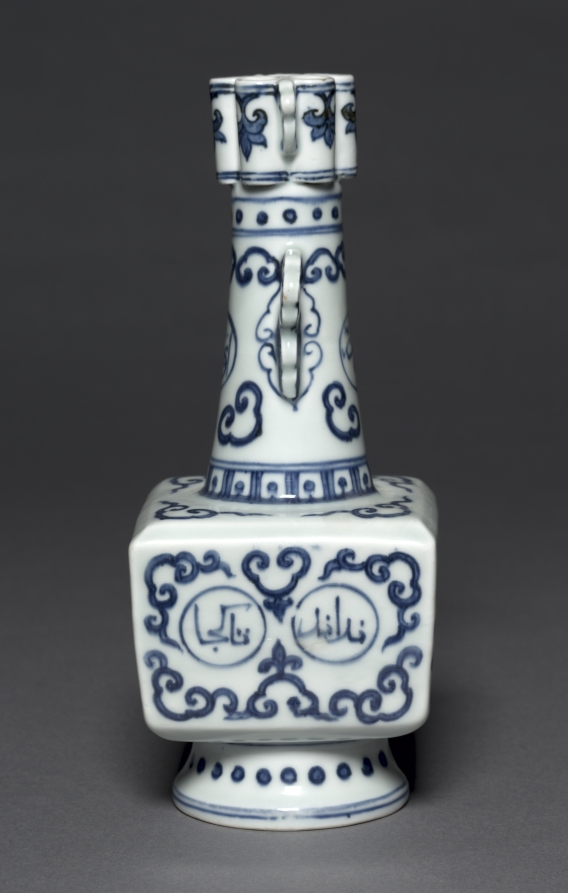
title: Arrow Vase with Persian Inscriptions and Floral Scrolls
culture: China, Jiangxi province, Jingdezhen kilns, Ming dynasty (1368-1644), Zhengde mark and reign (1505-1521)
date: 1506–21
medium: porcelain with underglaze cobalt blue decoration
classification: Ceramic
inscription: The two Persian inscriptions on the neck freely translated read 'Oh Beautiful! Oh Powerful'! Those around the body read 'None knows the extent and limits of Thy power and Majesty.'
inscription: 大明正德年製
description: Chinese potters in the 1500s integrated foreign motifs, shapes, and ideas in order to cater to changing tastes and new customers in an increasingly global world.